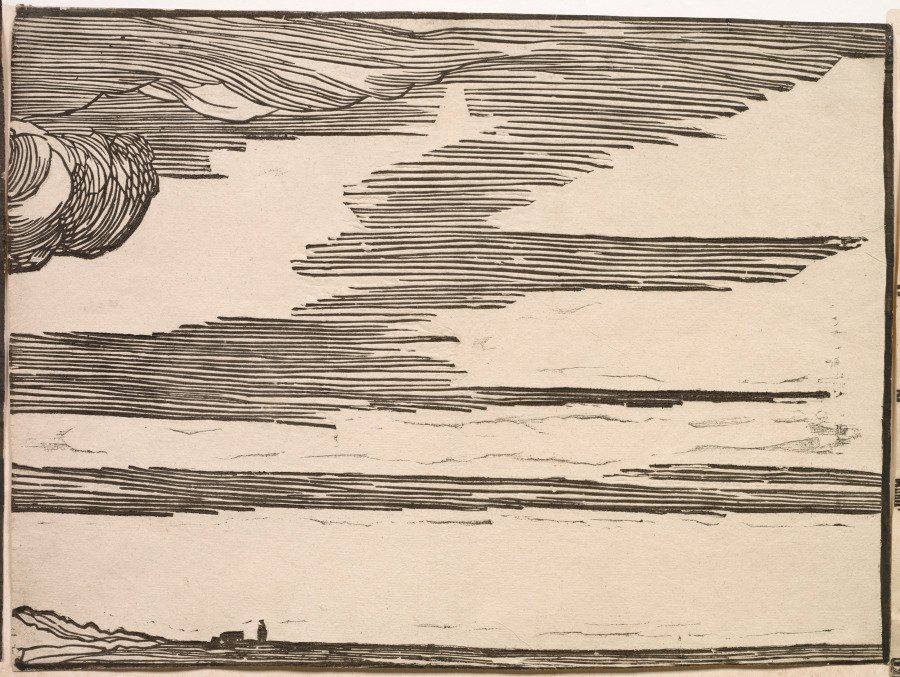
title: The Submersion of Pharaoh's Army in the Red Sea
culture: Italy, Venice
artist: Titian (Italian, c. 1488–1576)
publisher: Domenico dalle Greche (Italian, 1503–1603)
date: 1514–15, printed 1549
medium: woodcut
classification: Print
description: To make this monumental woodcut—considered one of the most ambitious prints of the Renaissance—Titian probably drew directly on the wooden blocks, after which a skilled cutter completed the blocks. The size rivals that of a painting, and the composition would have hung on a wall. Titian’s bold vision presents nature as a vehicle of God’s mercy and wrath. Moses, at right, having parted the seas for the Israelites to pass, commands them to close over the Egyptian forces (Exodus 14:21–31). Titian propelled the narrative with remarkable unity, dedicating entire blocks to the turbulent sea and rolling clouds that culminate in a magnificent cliff and Renaissance city. Some have interpreted the scene as an allegory of Venice’s troubles with the League of Cambrai, a military alliance that threatened the island city.